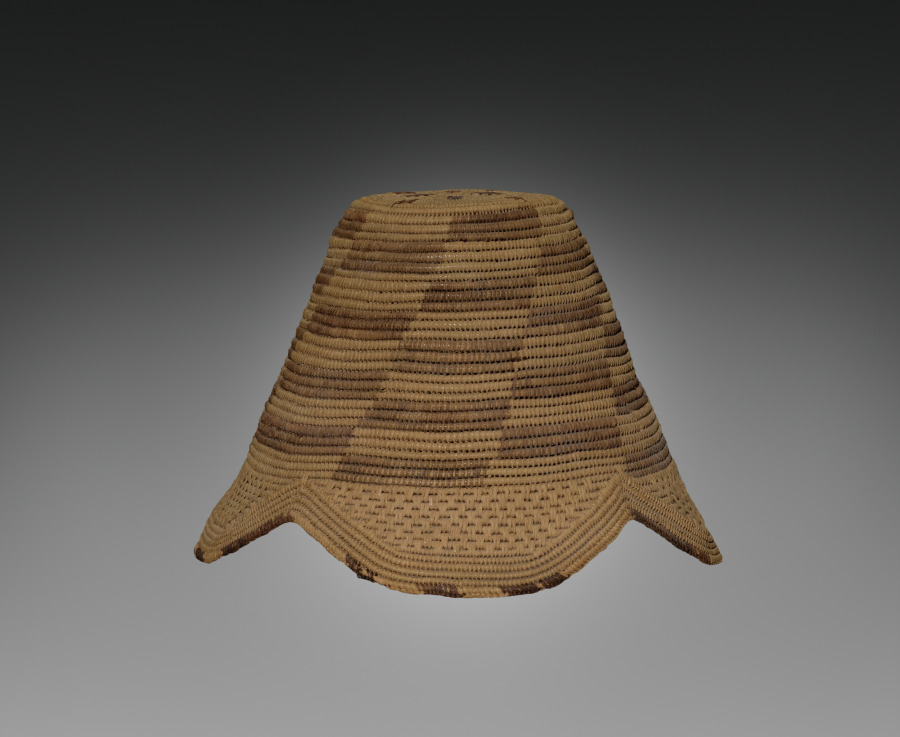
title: Hat (laket)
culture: Africa, Central Africa, Democratic Republic of the Congo, Kuba-style maker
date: early 1900s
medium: Raffia and dye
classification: Garment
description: Titled Kuba men and prominent women wear the laket, a small ornate dome-shaped hat. An essential fashion item of adult men in good social standing, it focuses special attention on the head as a significant marker of individual identity, ethnic affiliation, status, and role in society. This prestige object is secured on the crown of the head with a nine-and-a-half-inch metal pin that pierces through the hat onto a clump of hair. The laket is made from raffia palm fiber coiled into threads and woven in two alternating patterns and contrasting light and dark (dyed) wefts. There are two examples of the laket: the plain type with the flat top, and the more elaborate type called the laket mishiing.